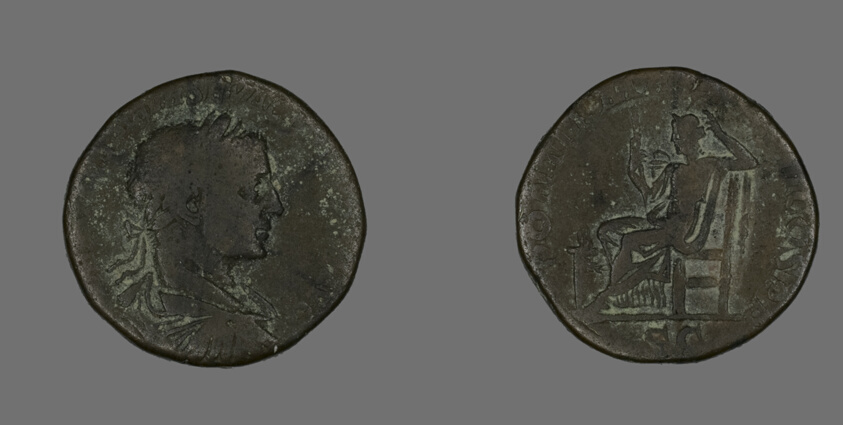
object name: Coin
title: Sestertius (Coin) Portraying Emperor Severus Alexander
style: roman (ancient, style or period)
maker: Roman, minted in Rome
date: 223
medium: Bronze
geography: Roman Empire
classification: coin; ancient art